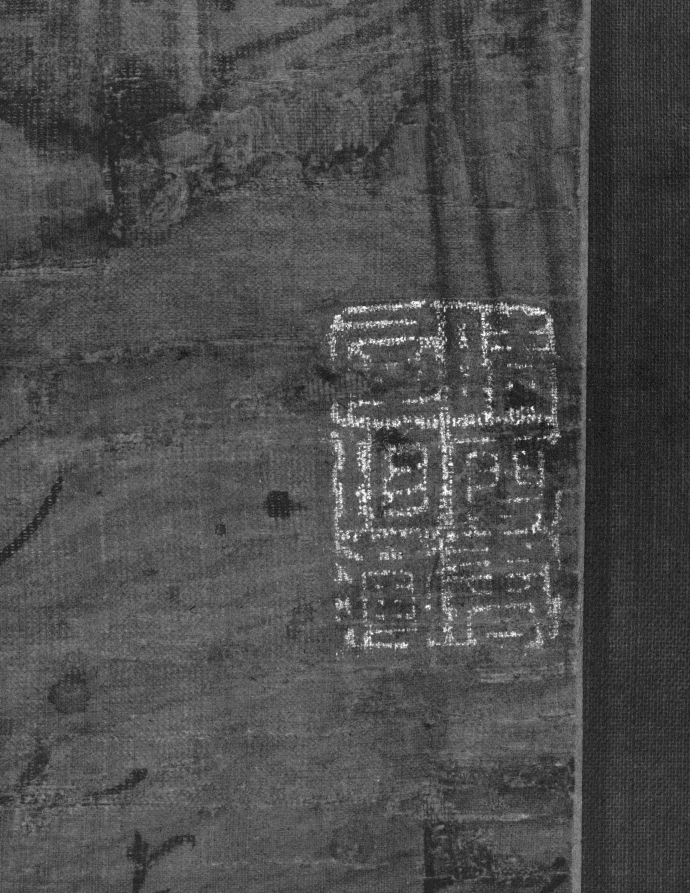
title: Summer Mountains (after Dong Yuan [active c. 937–75])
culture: China, Yuan dynasty (1271-1368)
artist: attributed to Huang Gongwang (Chinese, 1269–1354)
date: 1290–1354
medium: hanging scroll; ink and slight color on silk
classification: Painting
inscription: 【印】一峰道人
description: This monumental landscape is drawn in softly rounded strokes with darker lines frequently applied on top of lighter ones. This technique recalls one of the suggestions included in a collection of the artist's writings known as Secrets of Landscape Painting: The most difficult thing in painting is using the ink. The artist begins by using dilute ink and builds it up to the point where it begins to look right, then uses dense, black ink, applied fairly dry, and washes of deeper-toned ink. This technique distinguishes the fields from the paths, the far from the near. Huang Gongwang may have learned this technique from observing nature through the eyes of an earlier master, Dong Yuan, a painter whose style he shared.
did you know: The wet hills and moist, rich atmosphere evoke the southern Chinese summer, characterized by monsoon rains and lush growth.